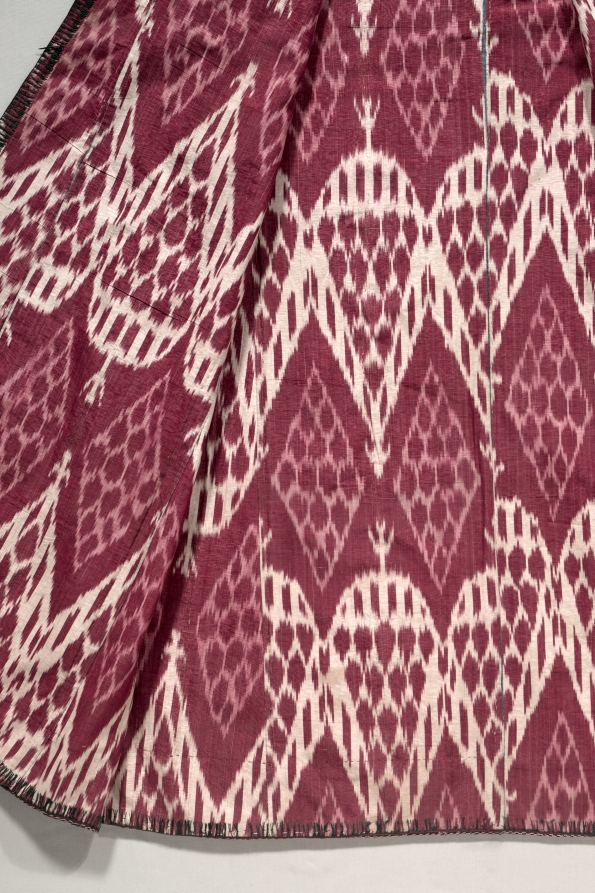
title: Man's surcoat (khalat)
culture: Uzbekistan, Shahr-i Sabz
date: late 1800s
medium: Silk: embroidery, cross-stitch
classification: Garment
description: Prestigious men’s surcoats embellished with designs such as this dramatic decoration in cross-stitch were among the most elaborate silk-thread embroidered garments in Central Asia. In a flamboyant style, large palmettes framed by split palmette leaves dominate with quartered rosettes and smaller flora on a brilliant yellow ground. Foliate vines enhance the edge along the front center opening, hemline, and cuffs. It is lined with an ikat of cypress trees and finger-looped trim. The style and technique represent professional work from Shahr-i Sabz, south of Samarkand. The pattern was drawn on the cotton ground cloth of the surcoat, then disassembled for stitching, and finally reassembled—revealed by severed and misaligned motifs plus mismatched colors.